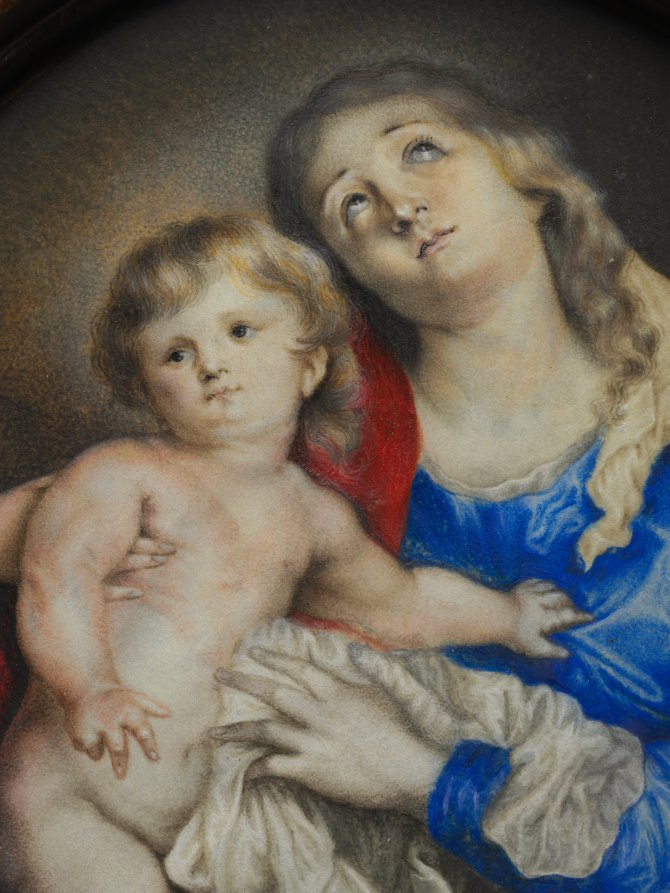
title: Virgin and Child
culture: England, 17th century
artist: Anna Maria Carew (British)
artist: after Anthony van Dyck (Flemish, 1599–1641)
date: c. 1662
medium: watercolor heightened with gum on vellum, with gold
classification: Portrait Miniature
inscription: signed at right center: "Maria Carew / fect"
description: Larger in size than most portrait miniatures, the Madonna and Child by Anna Maria Carew is a cabinet miniature, or a small work on vellum, enamel, or ivory that copies a full-scale oil painting. In this case the original painting was by Flemish artist Anthony van Dyck, and engraved by Paulus Pontius around 1630 shortly after it was painted. As a cabinet miniature, this work is somewhat unusual because of its religious subject and its simplicity. Cabinet miniatures tended instead to reproduce paintings of dramatic subjects and climactic moments in myths or religious stories. They could be hung on the wall or stored in elaborate and specially designed furniture, and they were often displayed in the smaller, more private rooms of a house.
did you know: King Charles II awarded Carew an annual pension to copy in miniature from the royal collection.